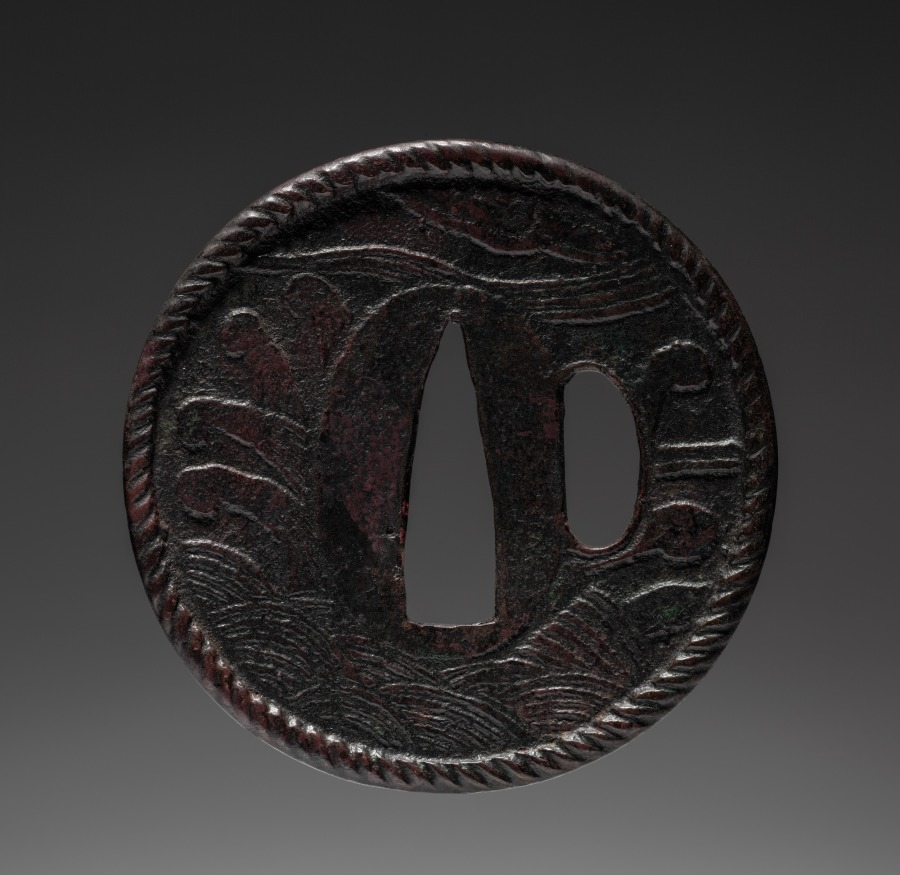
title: Sword Guard (Tsuba) with Dragon in Waves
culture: Japan, possibly Edo period (1615-1868)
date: c. 1615–1868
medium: iron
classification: Arms and Armor